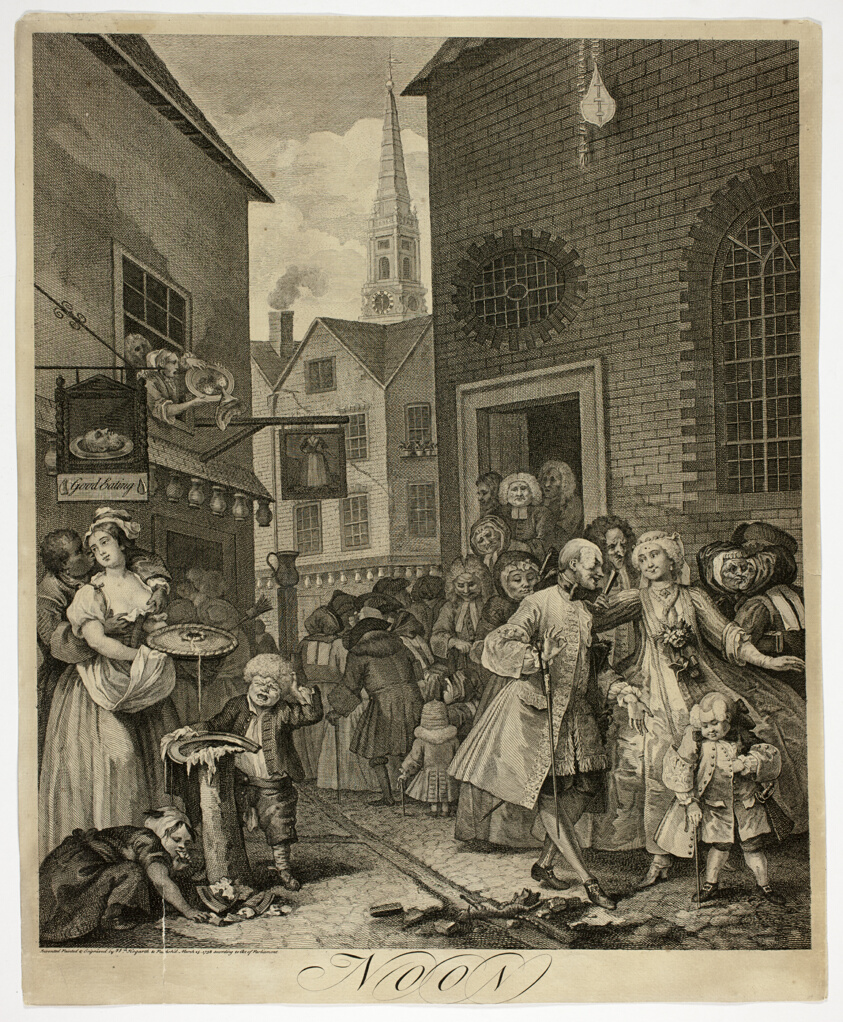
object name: Print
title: Noon, Plate Two from The Four Times of Day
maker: William Hogarth (English, 1697-1764)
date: 1738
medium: Etching and engraving in black on cream laid paper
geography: England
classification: etching; print; prints and drawing